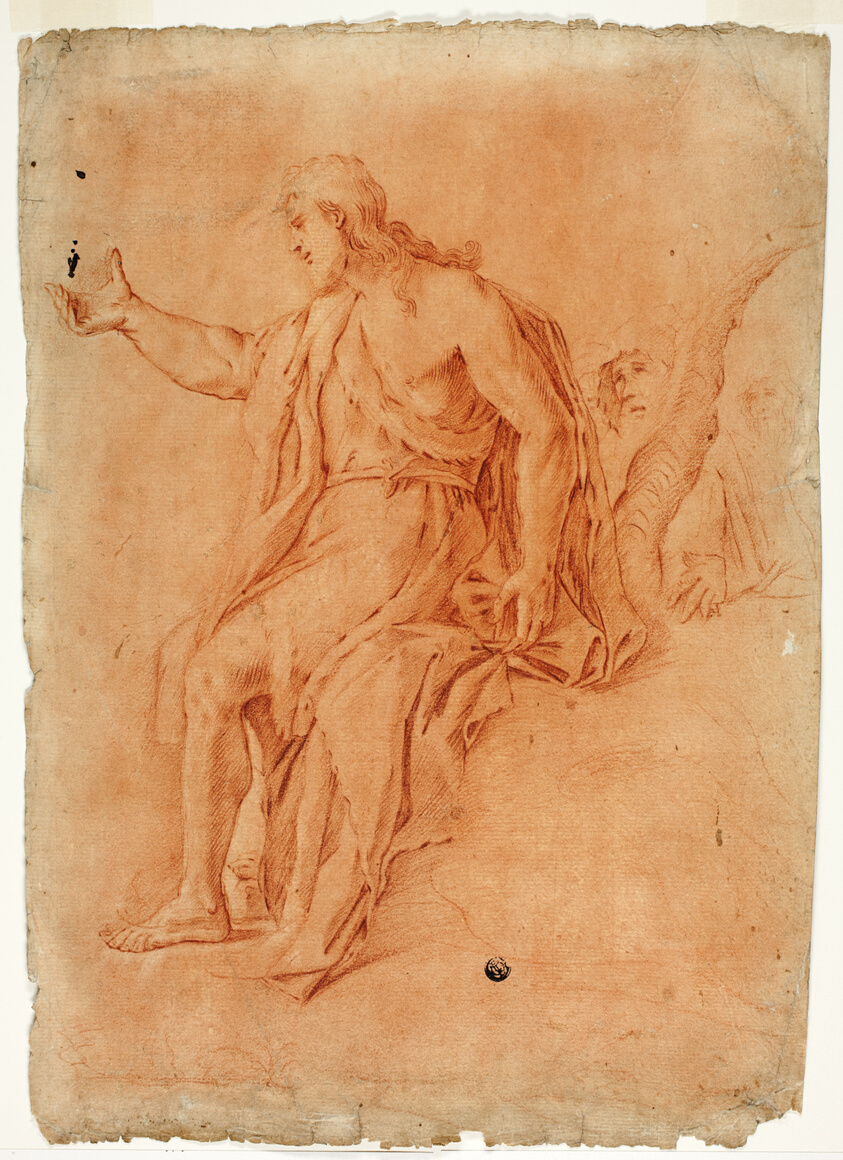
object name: Drawing and Watercolor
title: Saint John the Baptist Preaching (recto); Male Nude with Raised Arms and Sketches of Heads (verso)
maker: Luca Giordano (Italian, 1632-1705)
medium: Red chalk (recto and verso) on cream laid paper, prepared with a red chalk wash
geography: Italy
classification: chalk; drawings (visual works); prints and drawing; paper